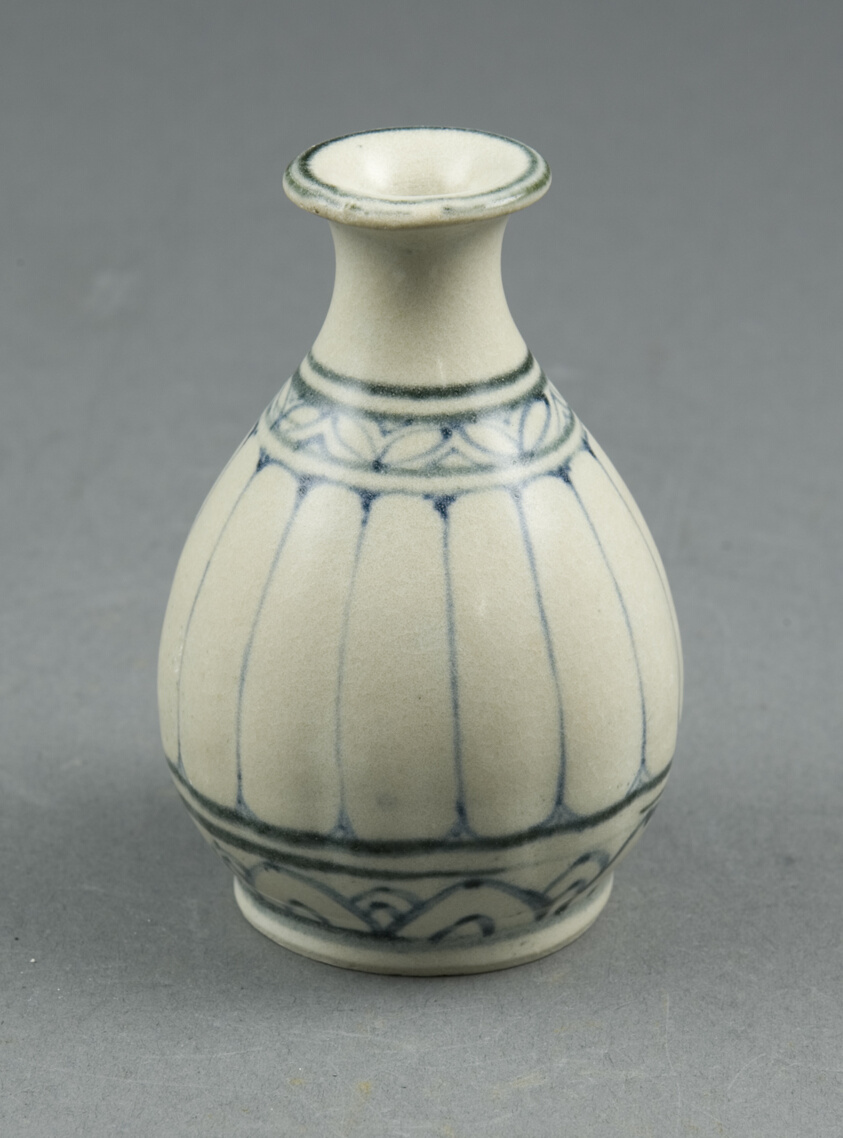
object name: Ceramics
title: Miniature Pear-Shaped (Yuhuchun) Bottle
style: Southeast Asian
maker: Vietnam; near Hoi An (offshore)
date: Late 15th/early 16th century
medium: Glazed stonware with cobalt-blue underglaze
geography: Vietnam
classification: ceramics; bottle; stoneware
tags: drinking, blue (color)